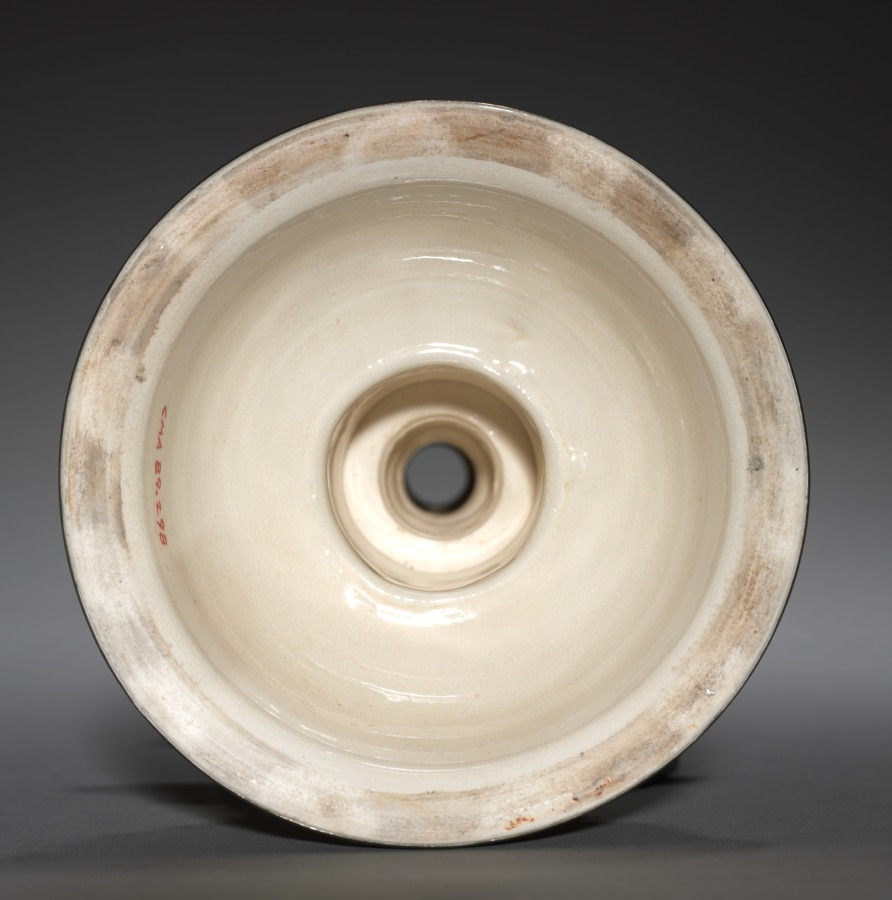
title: Candlestick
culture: China, Ming dynasty (1368–1644)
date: 1600s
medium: glazed porcelain with metal rims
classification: Ceramic